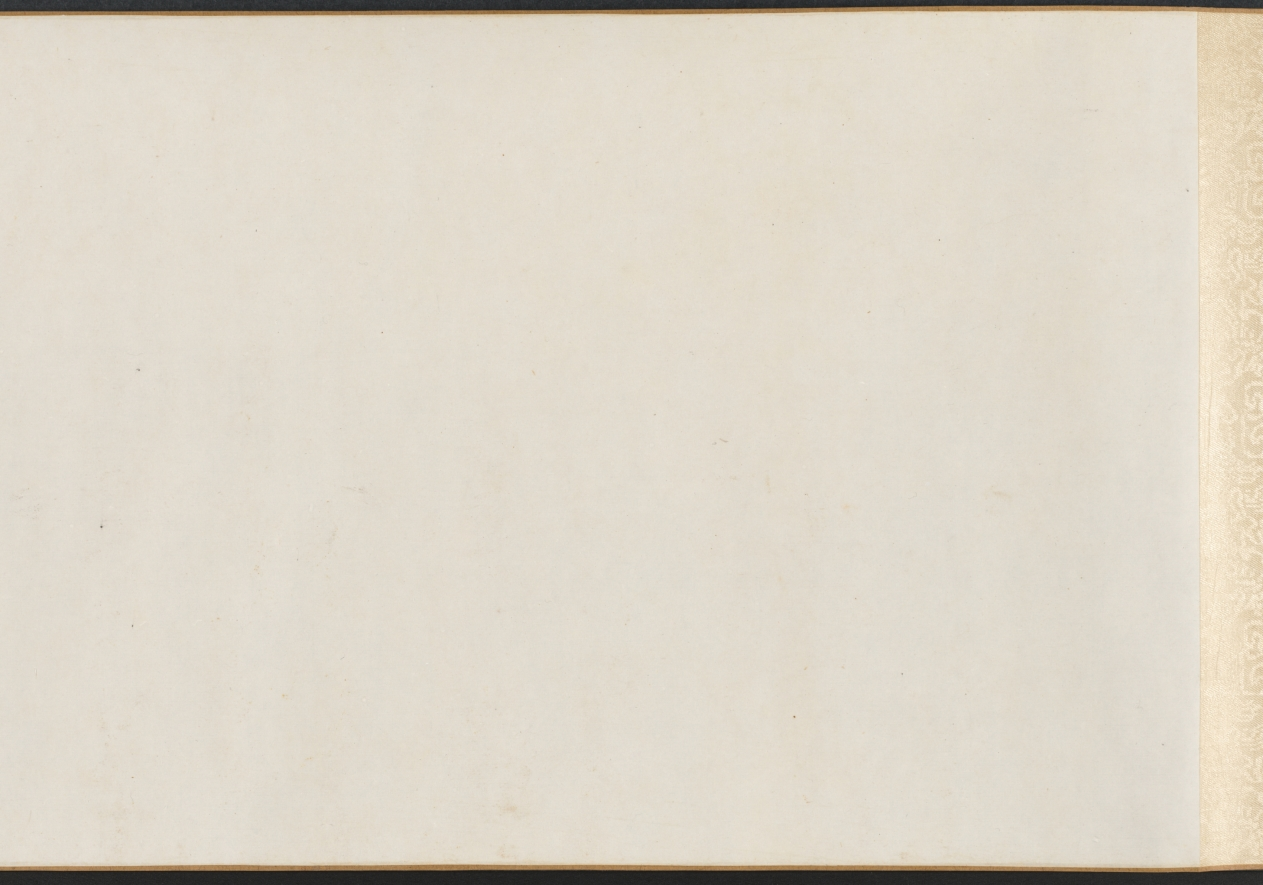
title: The Nine Elders of the Mountain of Fragrance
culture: China, Ming dynasty (1368–1644)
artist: attributed to Xie Huan (Chinese, c. 1370-c.1450)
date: 1426–52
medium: handscroll, ink and color on silk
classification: Painting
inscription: 4 seals: 2 of Xiang Yuanbian 項元汴 (1525–1590); 1 of the Qianlong Emperor (r. 1736-95); 1 of C. C. Wang 王季遷 (1907–2003)